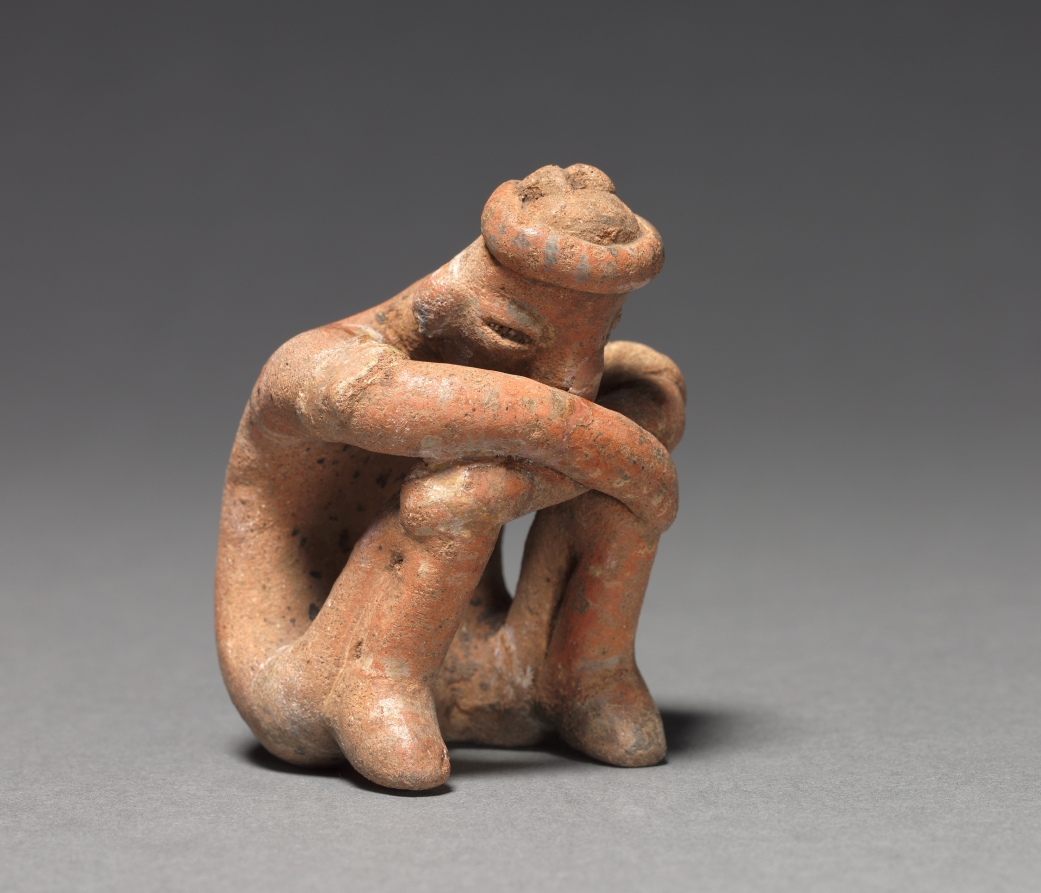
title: Seated Male Figurine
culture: Mesoamerica, Veracruz, Remojadas Style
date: 500–900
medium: ceramic, pigment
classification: Sculpture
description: Clay figurines were the earliest and most common art form in Mexico and other countries in the ancient Mesoamerican (Middle American) culture region. Made first by hand and later with molds, most figurines belong to the traditions of commoners, such as farmers, rather than those of elites.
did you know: Clay figurines were the earliest, most common art form in the ancient Mesoamerican culture region.